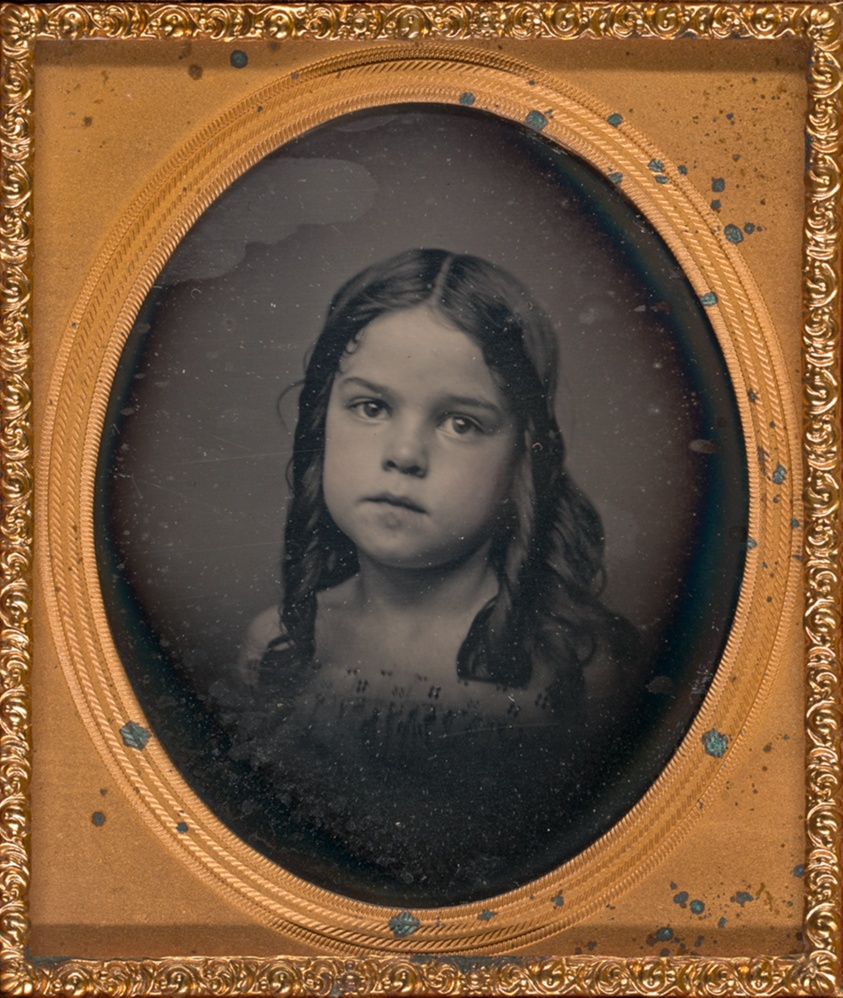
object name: Photograph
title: Untitled (Young Girl)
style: 19th century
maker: Artist unknown; 19th century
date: 1839/99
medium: Daguerreotype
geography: Unknown Place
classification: daguerreotype; photographic process; photography; photograph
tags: portraits, portraits: female subject, photography, formal portraits, portraits: child subject